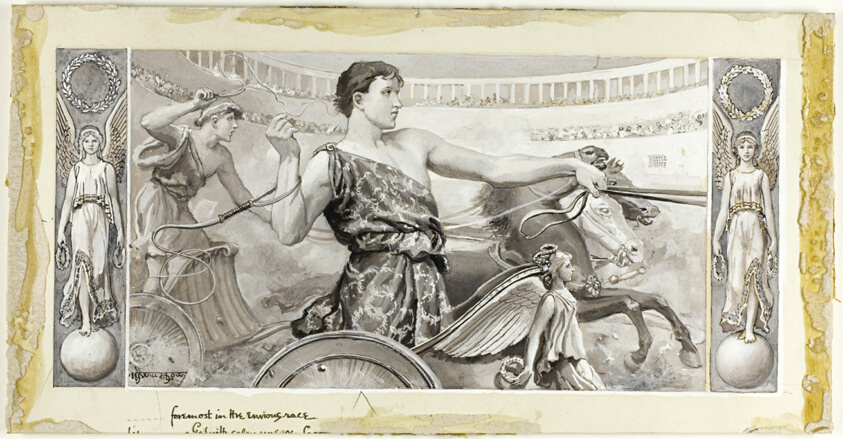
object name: Drawing and Watercolor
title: Foremost in the Envious Race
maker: Will Hicock Low (American, 1853-1932)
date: 1885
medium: Gray and white gouache, with touches of brown and black gouache, over traces of graphite, on cream wood-pulp laminate board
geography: United States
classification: drawings (visual works); prints and drawing